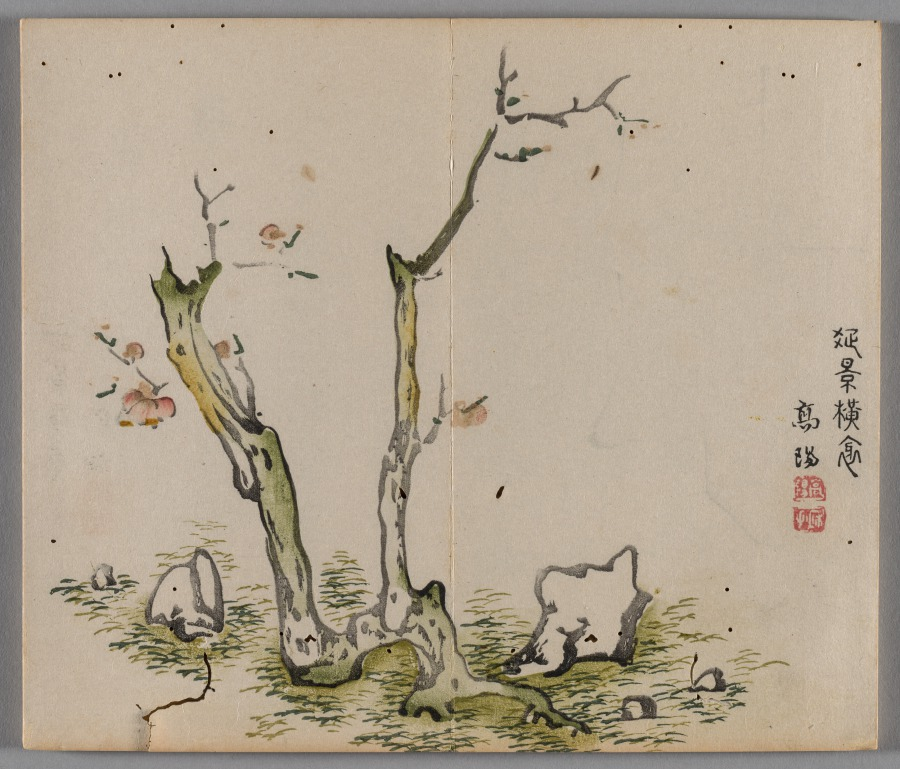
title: Ten Bamboo Studio Painting and Calligraphy Handbook (Shizhuzhai shuhua pu): Plum Blossoms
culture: China, Qing dynasty (1644-1911)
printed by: Hu Zhengyan (Chinese, c. 1584–1674)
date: 1633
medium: Woodblock-printed book; ink and colors on paper; first edition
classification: Print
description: Color printing reached a level of perfection in the early 1600s, as seen in this Ten Bamboo Studio Collection of Calligraphy and Painting and the Mustard Seed Garden Manual of Painting (printed 1679 and 1701). The painterly quality, precision in registering (aligning) the woodblocks, and harmonious colors made them the most successful color print editions in Chinese history. Both editions were printed and compiled in Nanjing, spread nationwide, and had a great impact on the arts in Japan and Korea.